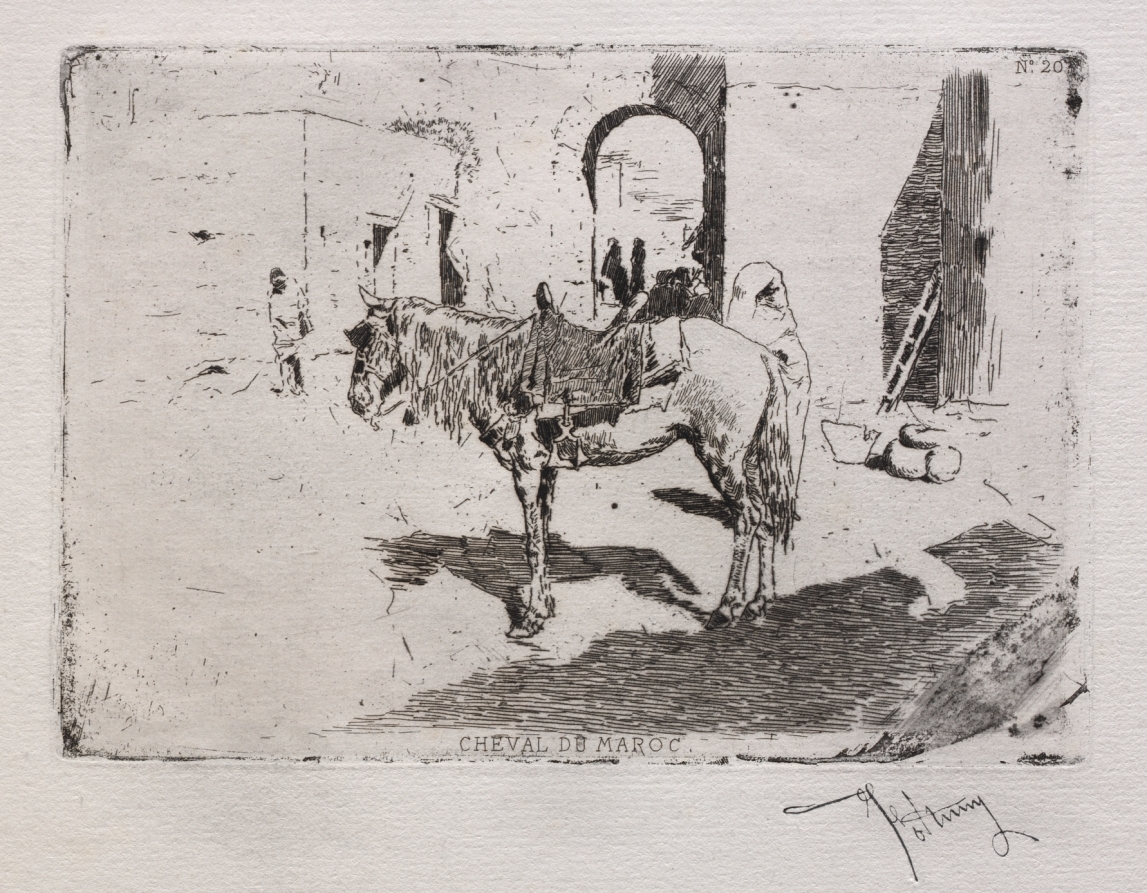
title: Moroccan Horse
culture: Spain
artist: Mariano Fortuny (Spanish, 1838–1874)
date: c. 1862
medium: etching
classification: Print